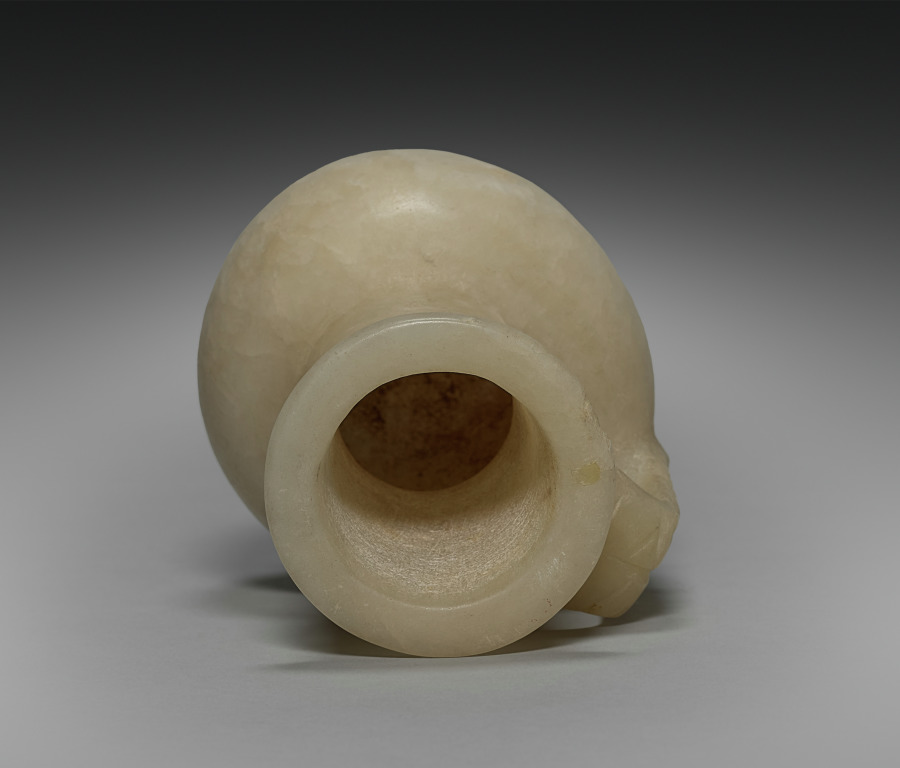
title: Long-Necked Flask with Strap Handle and Lid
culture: Egypt, New Kingdom (1540–1069 BCE), Dynasty 18, reign of Tuthmosis III (1479–1425 BCE)–reign of Amenhotep III (1390–1352 BCE)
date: 1401–1353 BCE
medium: travertine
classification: Vessels